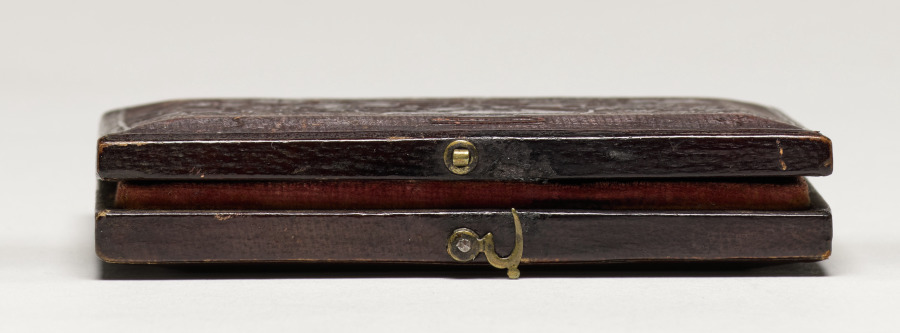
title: Girl with Doll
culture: America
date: 1850s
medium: daguerreotype, sixth plate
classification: Photograph